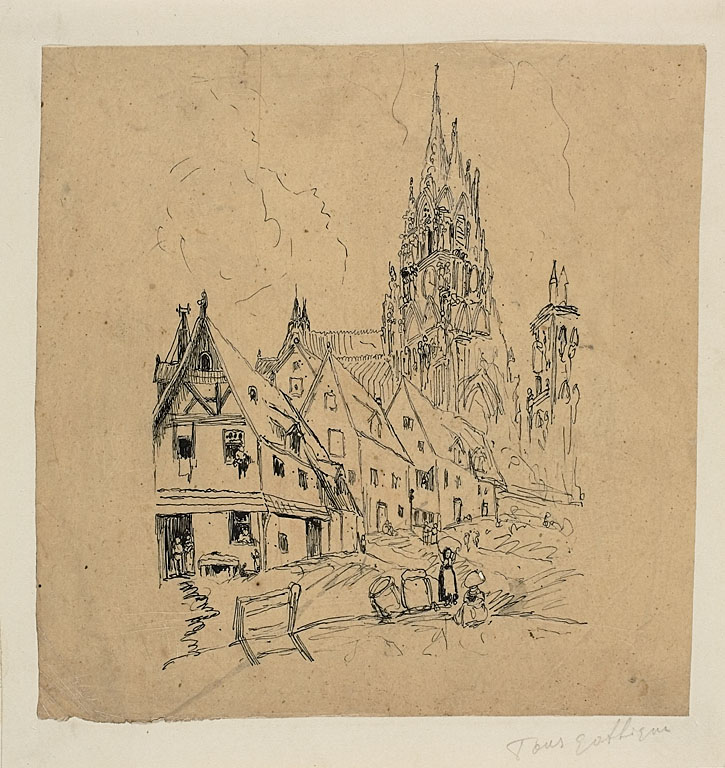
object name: Drawing and Watercolor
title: Gothic Cathedral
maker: Rodolphe Bresdin (French, 1825-1885)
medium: Pen and black ink, on tan tracing paper, laid down on ivory wove paper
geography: France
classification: pen and ink drawings; drawings (visual works); prints and drawing